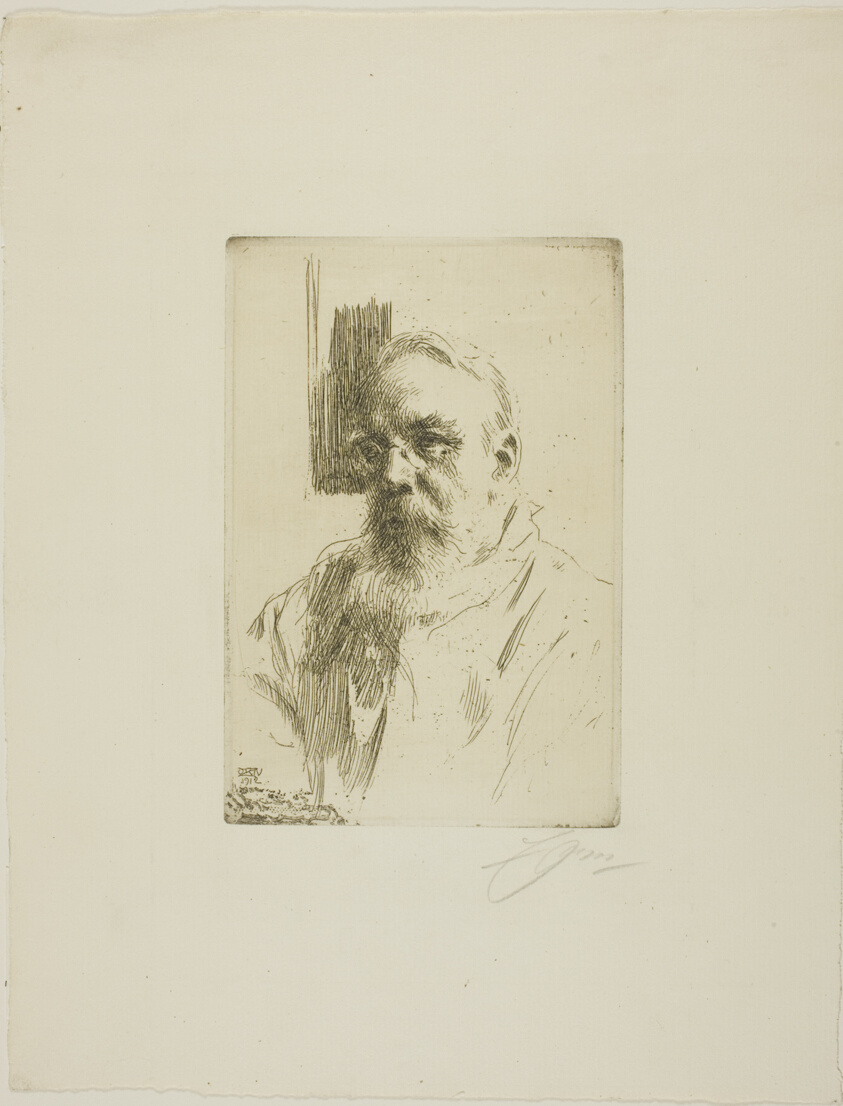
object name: Print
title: Professor John Berg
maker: Anders Zorn (Swedish, 1860-1920)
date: 1912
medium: Etching on ivory laid paper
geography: Sweden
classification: etching; print; prints and drawing